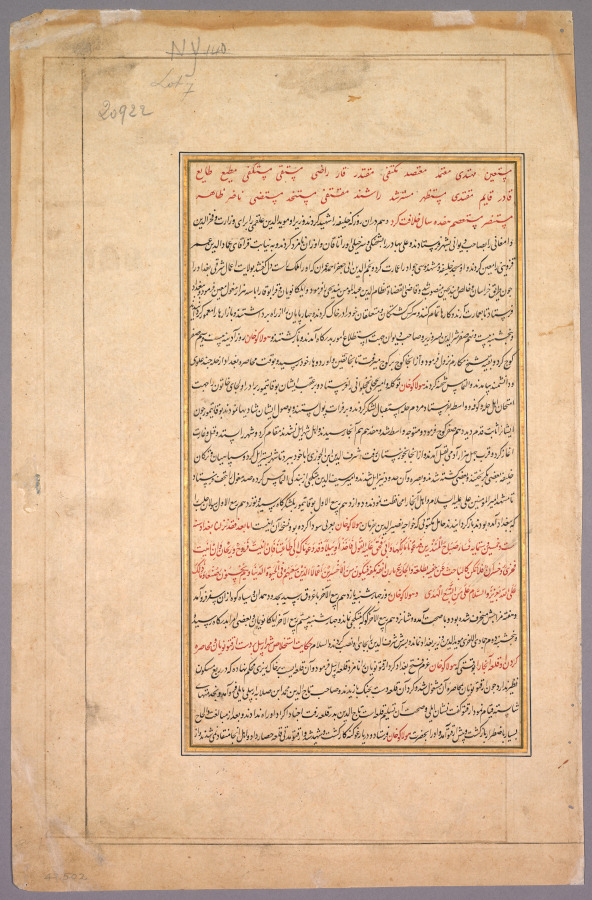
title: The siege of Arbela in the era of Hulagu Khan, from a Chingiz-nama (Book of Chingiz Khan) of the Jami al-tavarikh (Compendium of Chronicles) of Rashid al-Din (Persian, 1247–1318)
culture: Mughal India, court of Akbar (reigned 1556–1605)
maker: Basavana (Indian, active c. 1560–1600)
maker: and Sur Das Gujarati (Indian, active 16th century)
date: c. 1596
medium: Gum tempera, ink, and gold on paper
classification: Painting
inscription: recto lower left: [translated] Siege of the fort of Irbil by Urgatu Nuyan and the attainment of victory by command of Hulagu Khan.; verso overall: [text]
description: A Mongol conqueror riding a white horse gazes stonily at his defeated West Asian opponent in a scene that took place more than 300 years before this painting was made. By the end of the 1500s there was a new emphasis on creating paintings to accompany historical texts. Visually, the diagonal composition with cityscape at the top of the page—also found among the earliest Mughal paintings—was expanded to include throngs of participants and a startling new naturalism. Painting from the Akbar period reached its maturity by the 1590s in works such as this: dynamic in composition and gestures but contained within organized spaces and emphasized three-dimensionality.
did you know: The lord of the citadel in blue is negotiating its surrender to the Mongol general, who rides the white horse in the lower right.